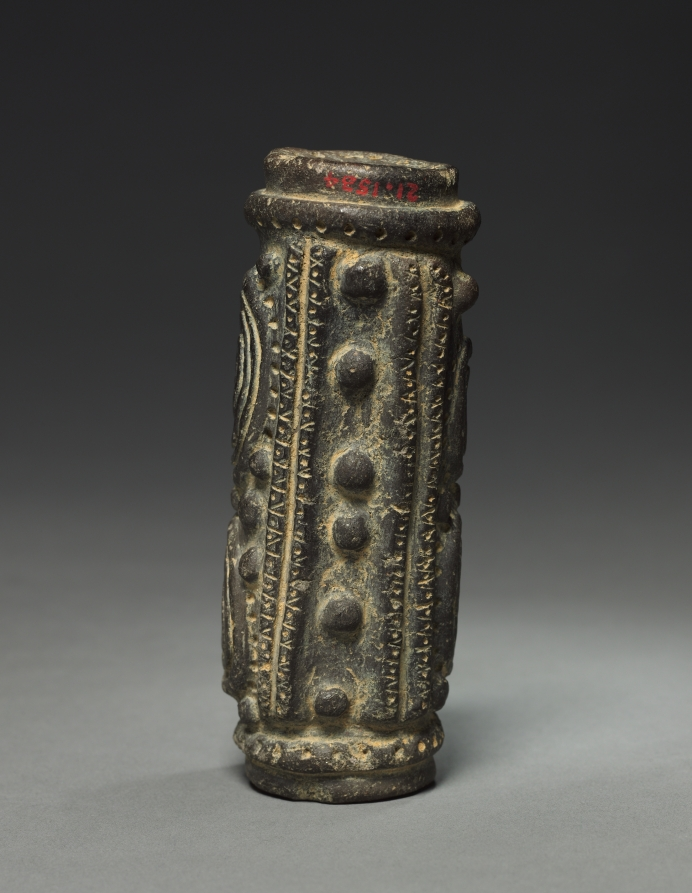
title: Roller Stamp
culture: Colombia, 19th-20th century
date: before 1921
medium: black ware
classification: Ceramic